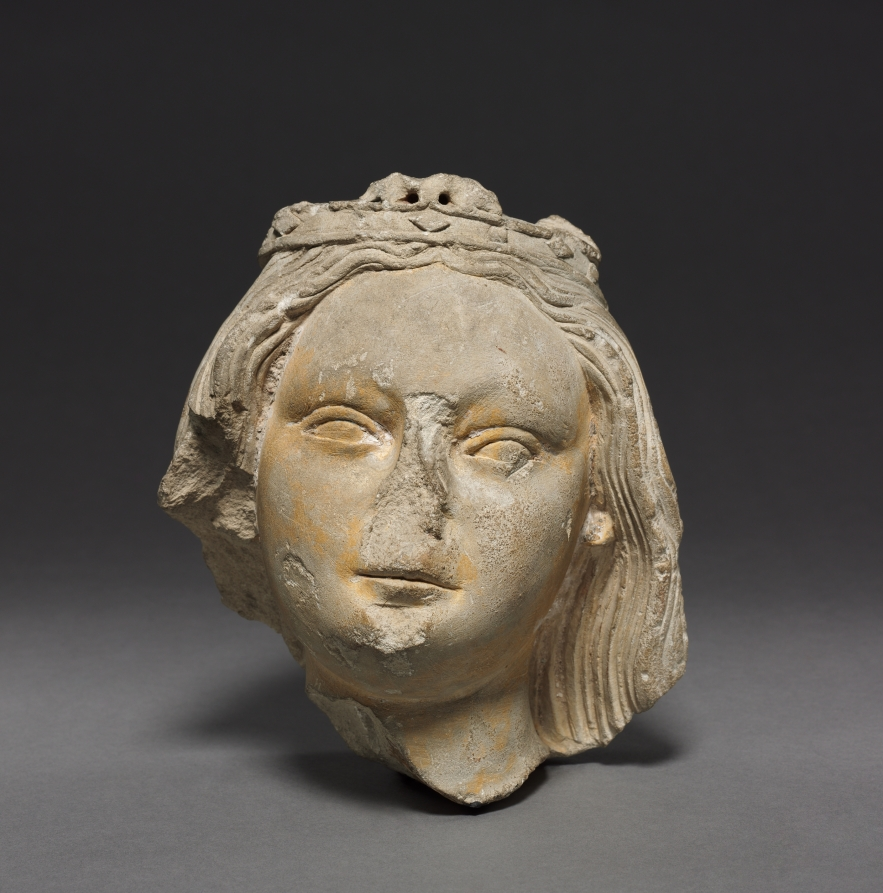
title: Crowned Female Head (Fragment)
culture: France, Champagne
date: c. 1400–1420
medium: limestone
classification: Sculpture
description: The origins of this sculptural fragment are not known. It is perhaps the final trace of the once beautiful figure of a standing Virgin and Child.